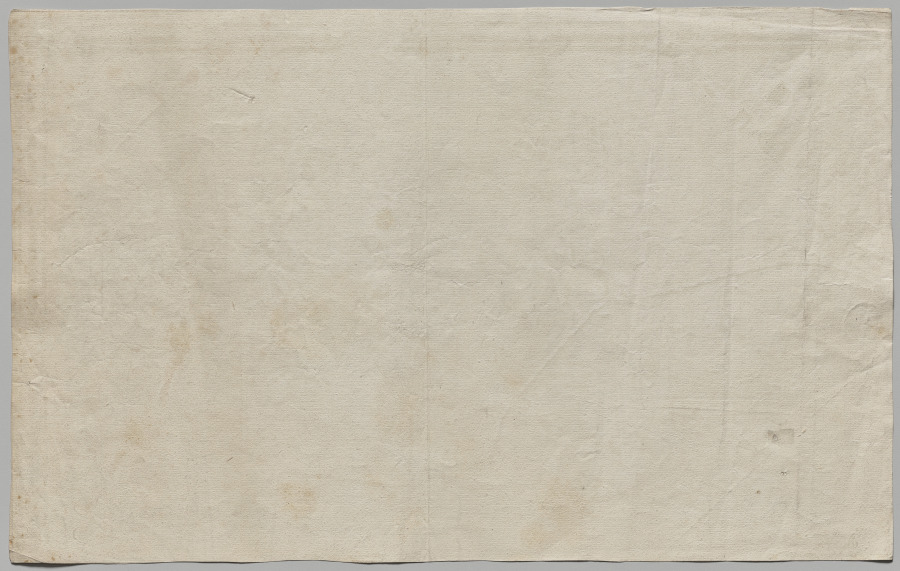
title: Nuova pianta di Roma data in luce da Giambattista Nolli l’anno MDCCXLVII, known as La Pianta Grande di Roma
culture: Italy, 18th century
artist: Giovanni Battista Nolli (Italian, 1701–1756)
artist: Carlo Nolli (Italian, 1690–1790)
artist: Rocco Pozzi (Italian, 1701–1774)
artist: Pietro Campana de Soriano (Italian, 1725–c. 1779)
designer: Stefano Pozzi (Italian, 1699–1768)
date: 1748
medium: etching and engraving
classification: Print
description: The monumental Pianta Grande di Roma, or Large Plan of Rome, which measures about 5 x 7 feet when its twelve plates are assembled, is a landmark in both cartography and printmaking. The map is considered the first scientific rendering of Rome, establishing new standards of accuracy and thoroughness when it was published in 1748. Devised by the Lombard architect and surveyor Giovanni Battista Nolli (Italian, 1701-56), the creation of the map required over ten years of surveying the city carried out by Nolli and a team of assistants with the help of new measuring devices. In Nolli’s “ichnographic” (also called “ground”) plan, architectural features and the urban infrastructure are reduced to a single horizontal slice, a minutely detailed footprint that conveys dimensions, proportions, and orientations to scale with the utmost clarity.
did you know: To make this map, Pope Clement XII granted the mapmaker permission to measure courtyards and other interior, inaccessible spaces in monastic communities, even those in nuns’ convents, which was controversial at the time.